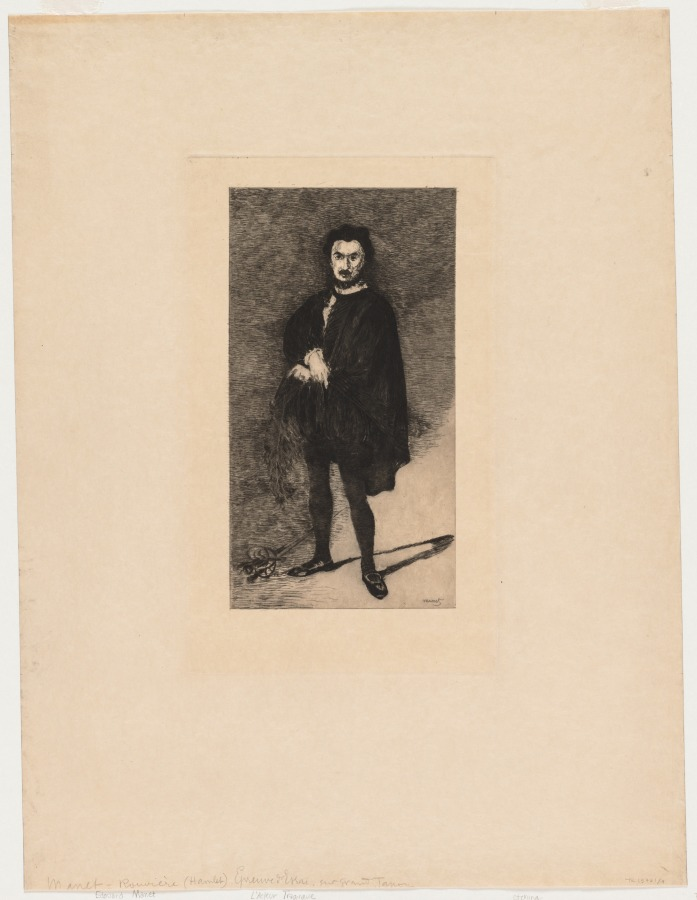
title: The Tragic Actor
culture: France, 19th century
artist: Édouard Manet (French, 1832–1883)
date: 1866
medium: etching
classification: Print